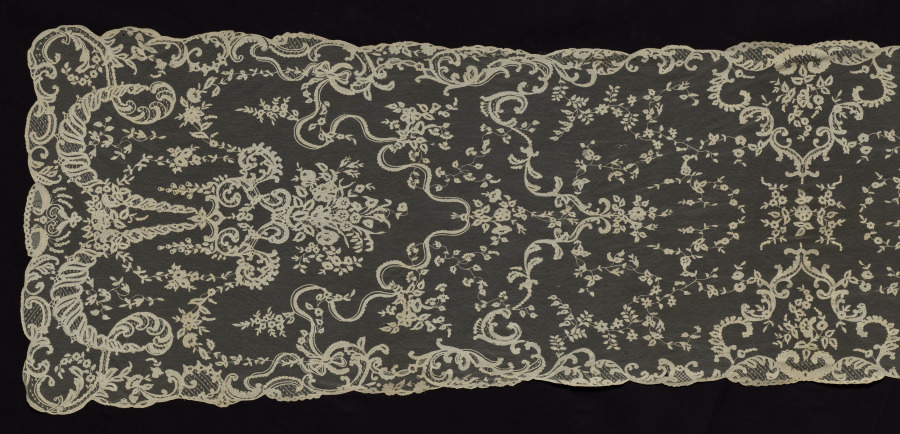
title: Lace Veil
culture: Ireland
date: 1800s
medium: Machine-made lace net (Carrickmacross) with appliqué and tambour work (chain stitch)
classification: Lace